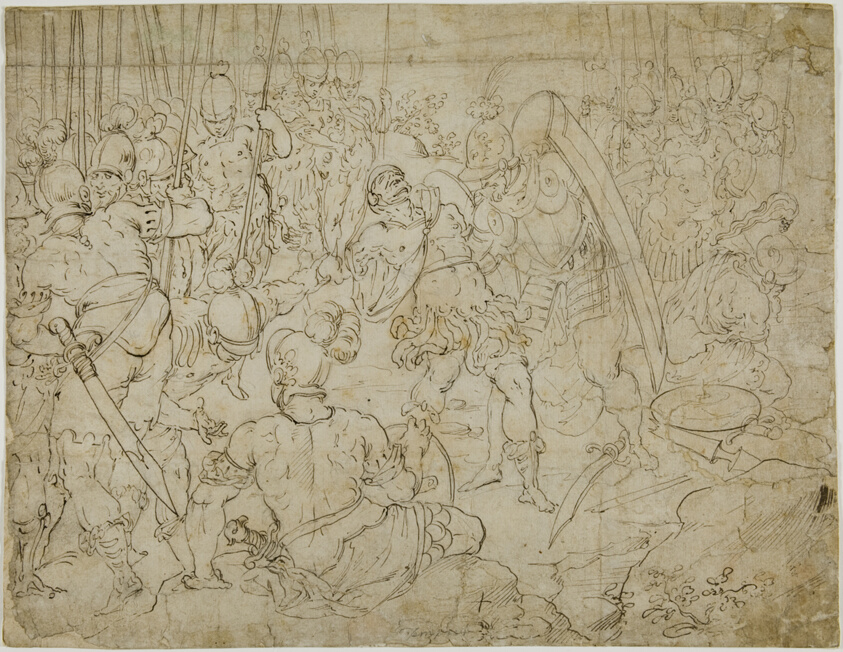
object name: Drawing and Watercolor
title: Armed Soldiers After Battle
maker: Genoese; Late 16th century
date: c. 1600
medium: Pen and brown ink over graphite, on tan laid paper, laid down on tan laid paper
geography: Italy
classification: pen and ink drawings; drawings (visual works); prints and drawing